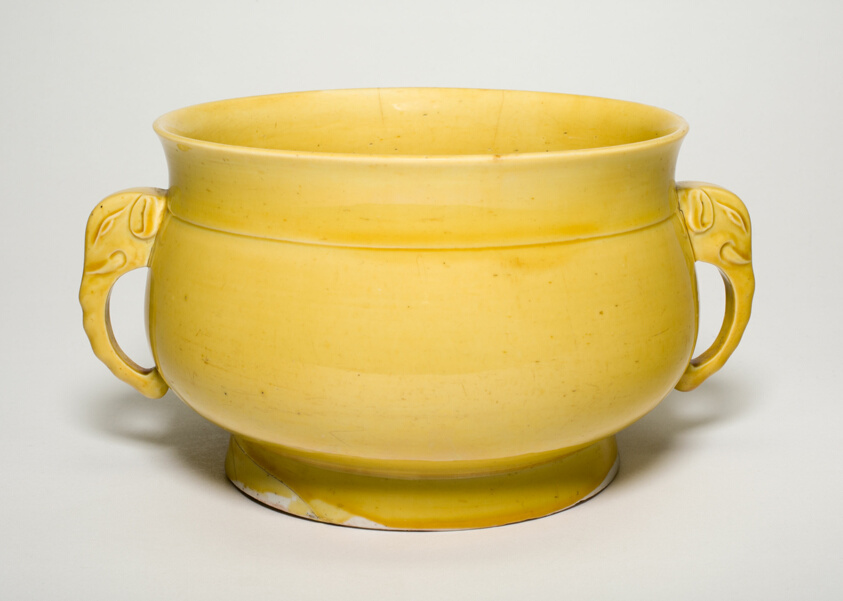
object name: Vessel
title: Gui-Shaped Bowl with Elephant Handles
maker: China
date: Ming dynasty (1368–1644), Chongzhen period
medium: Porcelain painted in overglaze enamel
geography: China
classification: porcelain; ceramics; asian art; vessel